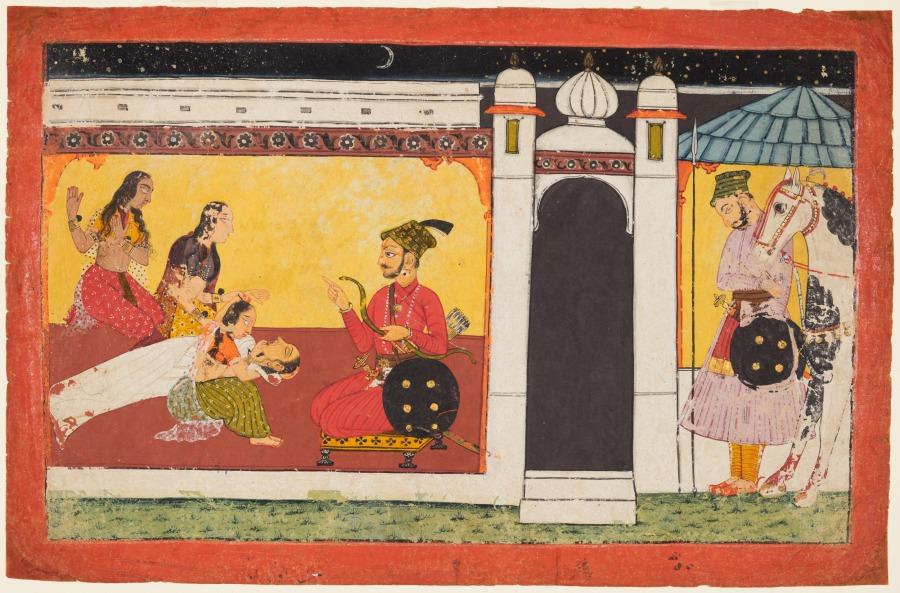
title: Kamakandala dies on hearing the news of Madhava’s death, folio 19 from a Madhavanala-Kamakandala of Alam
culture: Northern India, Pahari kingdoms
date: c. 1720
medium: gum tempera and gold on paper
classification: Painting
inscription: Takri number ‘19’ on verso; four lines of Takri script; (in English) Roman numeral: VII; K. Iswari Singh of Sirmur; number 191. caupai. kapata nahe rājā ucaraī. duhu tana prīta parīchā karaī. mai dekhyo mādhavanala jogī. nagara ujainī birahī biyogī. nārī bīyoge tāhī dukha bhayo. vīrahe sula vipa marī gayo. aise bacana jaba raye sunaye. lobha na dino suās ko gaye ahī saṃgī prāna. sunata hi jaise piṃgala kinā. vaise jiyu kandalā jinā. sakhiyāṃ jan jo nārī dhārī. jano baras ek ki māri. baithe dasan jibha bhari kāri. jhamake naina chuti gayi nāri. rovati sakhi chori ke kesā. rājā jibha mai kari andesā. jiha laga bipa ito dukha kinā. tina trihā bacana sunata jiva dinā. dohā. ali biyoga jima malatī sukhī pallavā sulā. dukhata muta bhayī kama basa sahī na sakata urī sula. caupai. gaye prāna kāma mari gayi. rājā ke man chintā bhaī. sir dhuni dhuni dehe prāna. kat ho bacana munavahi kāna. kauna utarī ho bīpātī deve. vaha mari jāyī dokha yohi leve. chali karī tīraha badha main kīnā. janī bujhī pāpa mai linā.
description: Having seen how desperately Madhava loves Kamakandala, King Vikrama decides to test Kamakandala to ensure she loves him equally. Time is compressed in this scene. King Vikrama is shown delivering the false news that Madhava died from a broken heart. In response, Kamakandala faints, and her friend sees that her tongue has turned black, according to the poem. Kamakandala then dies, and her friends cry and wail, letting their hair loose in an act of mourning; the king’s groom looks downcast. At the end, Madhava dies after hearing of Kamakandala’s death. King Vikrama is seized with deep regret, until a celestial being restores their lives, and the lovers are reunited.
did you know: The scene is set at night with a star-studded sky.